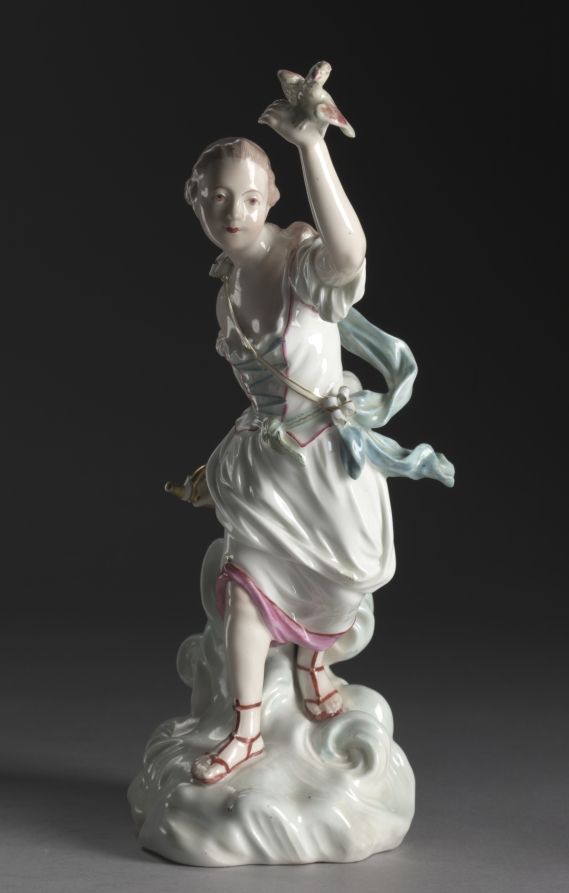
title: Air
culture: England, Derby, 18th century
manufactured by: Derby Porcelain Factory (Chelsea-Derby Period, 1770–84)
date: c. 1775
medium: soft- paste porcelain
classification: Ceramic